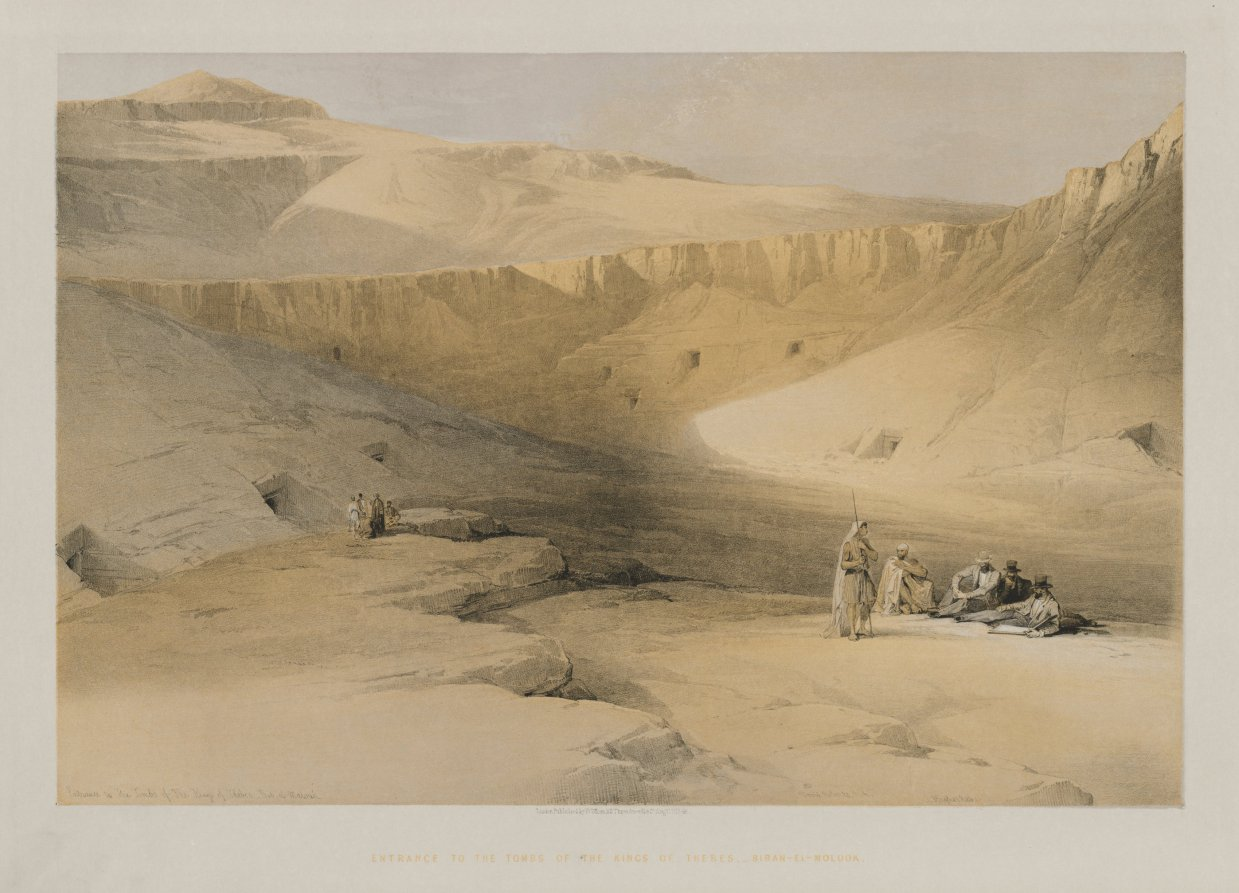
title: Egypt and Nubia, Volume II: Entrance to the Tombs of the Kings of Thebes, Bab-El-Malouk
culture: England, 19th century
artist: Louis Haghe (British, 1806–1885)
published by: F. G. Moon, 20 Threadneedle Street, London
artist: after David Roberts (Scottish, 1796–1864)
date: 1848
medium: color lithograph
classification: Print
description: By the mid-19th century, the complexities of printing in numerous colors had been mastered, culminating in one of the high points of European printmaking. The plates drawn by Haghe, which copy the watercolors that David Roberts made in Egypt, are exquisite examples of color lithography. Egypt was a distant, mysterious country for Europeans and Haghe, a Scottish topographical and architectural artist who spent the year of 1838 traveling across this ancient land. The resulting prints—the first comprehensive series of views of the monuments, landscapes, and people of the Near East—were especially appreciated for their brilliant color and large scale.